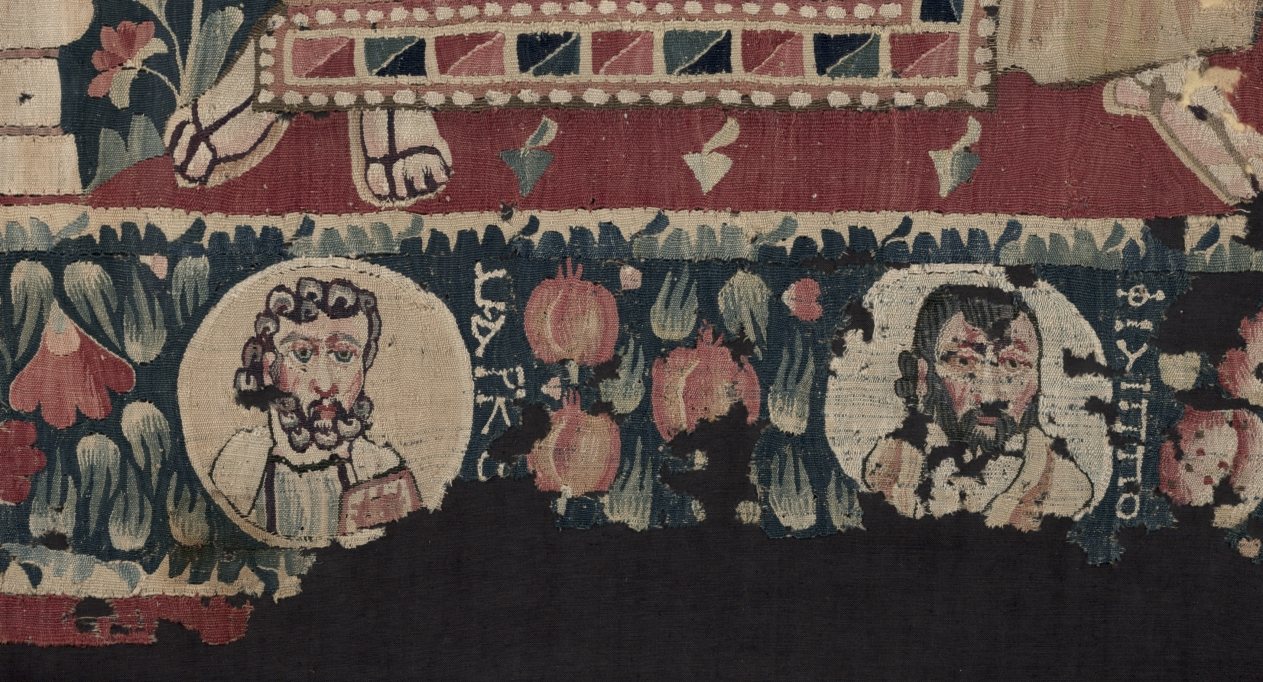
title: Icon of the Virgin and Child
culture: Egypt, Byzantine period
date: 500s CE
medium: wool and dye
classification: Textile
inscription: on the lintel of the architectural setting, the Greek inscription translates as: The Holy Michael, The Holy Mary, The Holy Gabriel. The wide foliate border is decorated with fruits and flowers and, in the lower part, with medallions containing the busts of apostles whose names are inscribed nearby in Greek and are translated as: Andrew, Matthew, Paul the Apostle, Luke, James, Phillip, Mark, Thomas, John, Matthias, Peter, and Bartholomew.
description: Woven from more than 20 colors of woolen thread, this rare tapestry was more expensive than a painting when it was made. The historical price reflected contemporary viewers’ appreciation for the skilled color blending by the weavers. Hung on a wall, this tapestry allowed viewers to venerate (honor) the Virgin Mary and the Christ Child in the Christian Orthodox church. Angels and apostles surround them, their names written in Greek. To be spiritually effective, an icon (devotional image) should follow its subject’s established visual tradition as closely as possible.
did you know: Created in Egypt's hot and dry desert climate, this tapestry features a border of lush greenery and fruits, while flowers peek out from around the throne of the Virgin. Imagine encountering this artistic oasis in a Coptic church during the dry heat of the day.